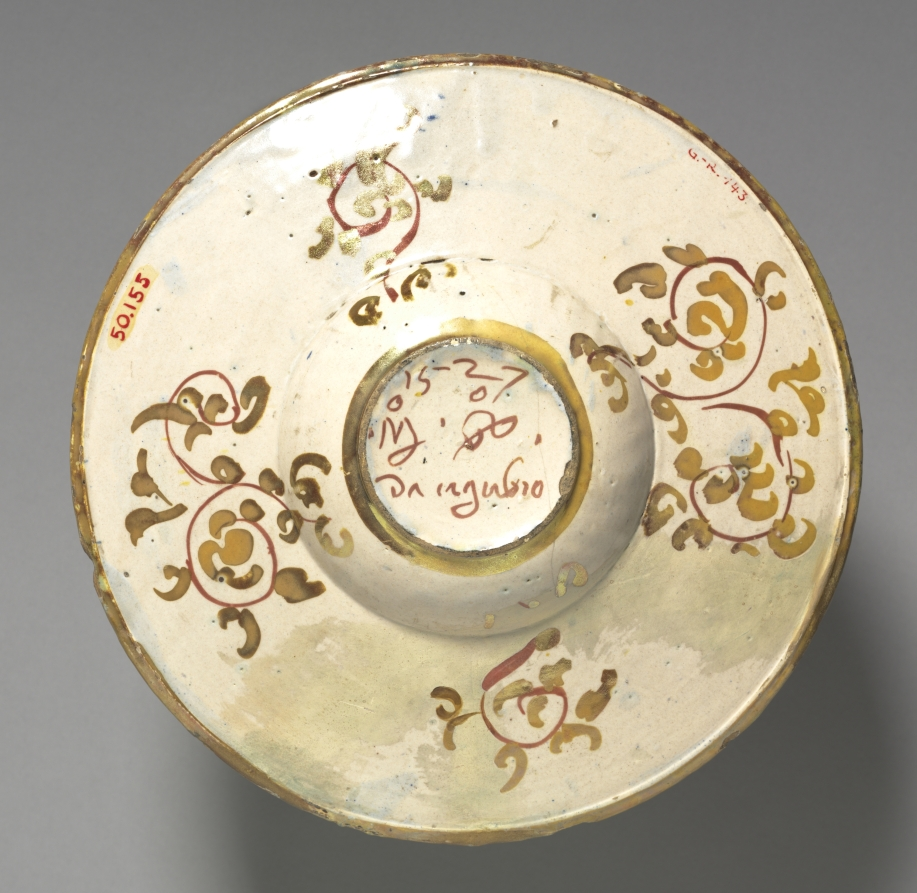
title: Plate with Arms of the Vitelleschi Family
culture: Italy, Urbino region, Gubbio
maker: circle of Maestro Giorgio Andreoli (Italian, 1465?–1553)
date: 1527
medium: tin-glazed earthenware with gold luster (maiolica)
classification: Ceramic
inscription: signed: M. G da Agubio, 1527.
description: Italian nobles of the 1500s often expressed their wealth, social status, and sophistication by ordering large sets of maiolica that sometimes carried their coats of arms or even likenesses, usually in profile as in portraits of the period. Reserved for use at festival events such as a wedding or commissioned to mark a special occasion or an important visit, elaborately decorated utilitarian vessels in maiolica were prized as works of art by their owners and displayed as such in their residences.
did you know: Today, the Palazzo Vitelleschi, home of the Vitelleschi family in Tarquinia, a coastal town north of Rome, is an archaeological museum.